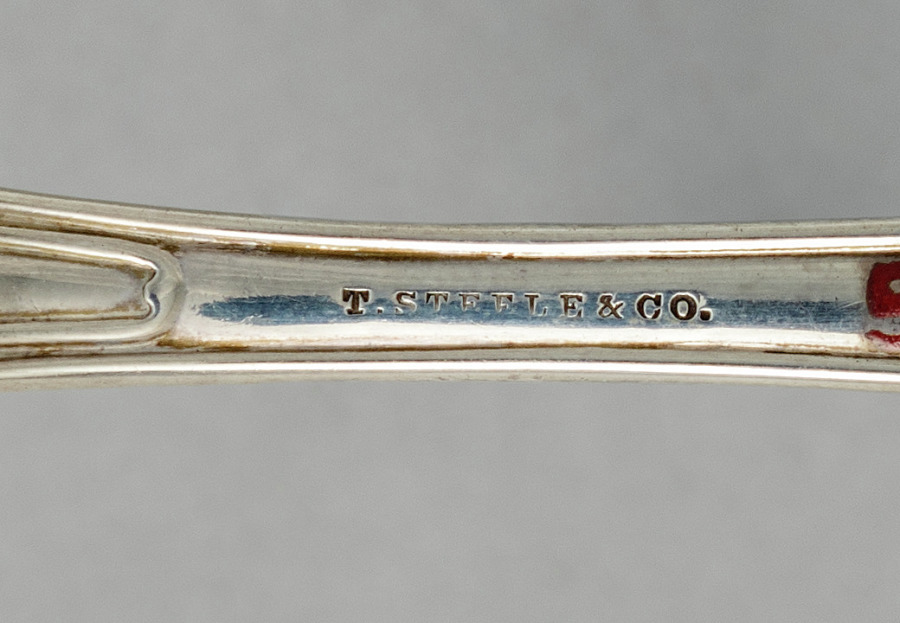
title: Tablespoon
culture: America, Connecticut, Hartford, 19th century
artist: firm of T. Sedgwick Steele (American)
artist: firm of Thomas Steele (American, 1812–1875)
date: c. 1859–1865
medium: silver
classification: Silver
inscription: engraved "JAT" in bright-cut script on top of handle end.